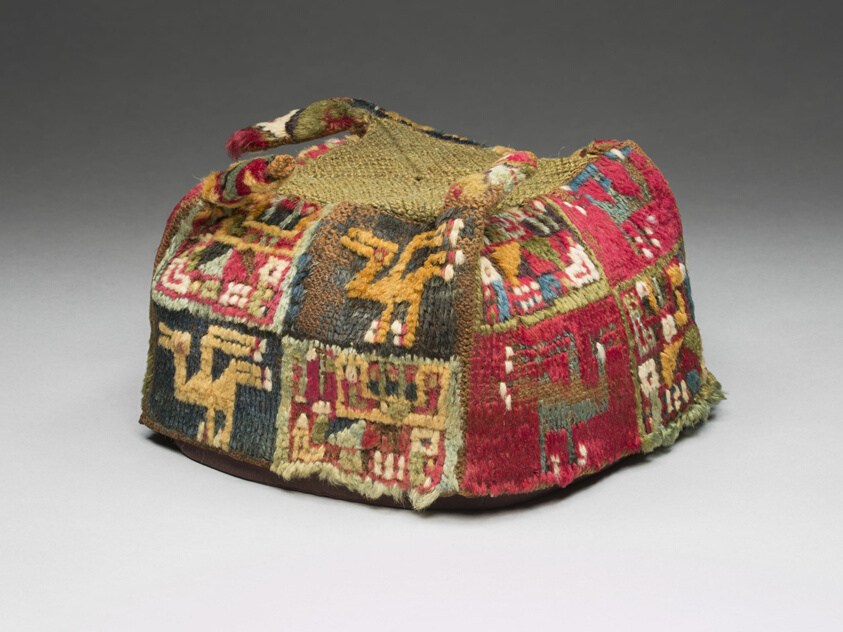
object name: Costume and Accessories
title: Hat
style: huari, early intermediate period, Pre-Columbian, americas, andes, andean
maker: Wari (Probably central or south coast, Peru)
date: A.D. 600/900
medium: Wool (camelid), square knotted ground with interworked yarns forming cut pile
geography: Peru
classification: textile; needlework (visual works)